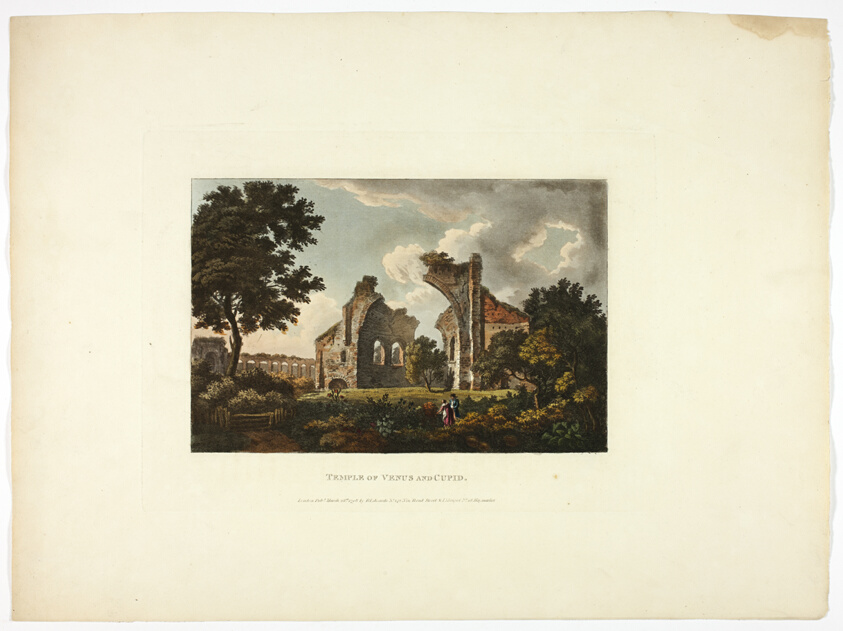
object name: Print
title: Temple of Venus and Cupid, plate twelve from the Ruins of Rome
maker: M. Dubourg, (English, active 1786-1838); published by J. Merigot (Italian, Unknown)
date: published March 23, 1798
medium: Hand-colored aquatint on paper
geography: England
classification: aquatint; print; prints and drawing